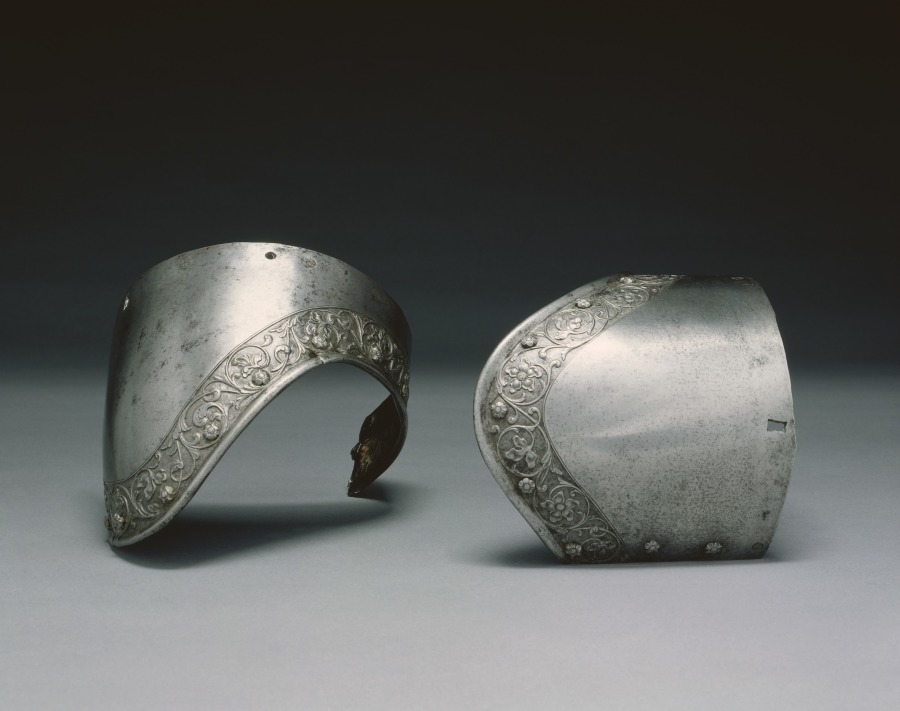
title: Pair of Upper Arm Canons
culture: Itlay, Milanese style of 16th century, probably 19th century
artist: attributed to Negroli Workshop (Italian, c. 1500–1561)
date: 1800s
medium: steel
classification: Arms and Armor